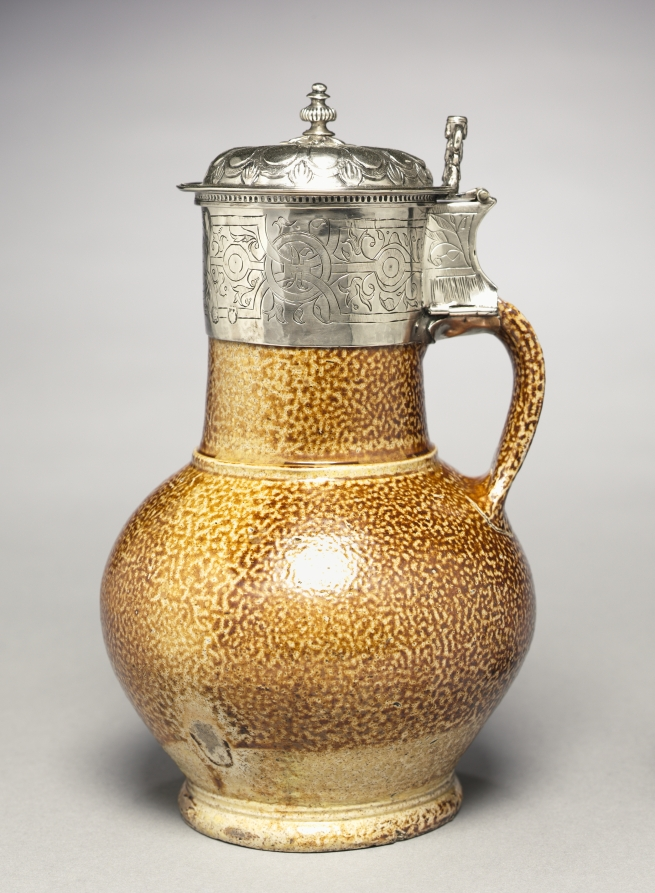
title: Covered Jug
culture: Germany (jug) and England (mounts), 16th century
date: c. 1570–1573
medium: Tigerware, silver mount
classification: Ceramic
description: German Stoneware The production and export of German stoneware reached its peak in the late 1500s. Prized for its durability and stone-like appearance, German stoneware became one of the most widely traded forms of pottery, even finding popularity in early America. The distinctive pebbly glass surface, resembling an orange peel, was achieved by introducing salt into the hot kiln during the firing process. This glaze gave clear definition to the coats of arms or other emblems that often formed the surface decoration on large works, usually jugs.